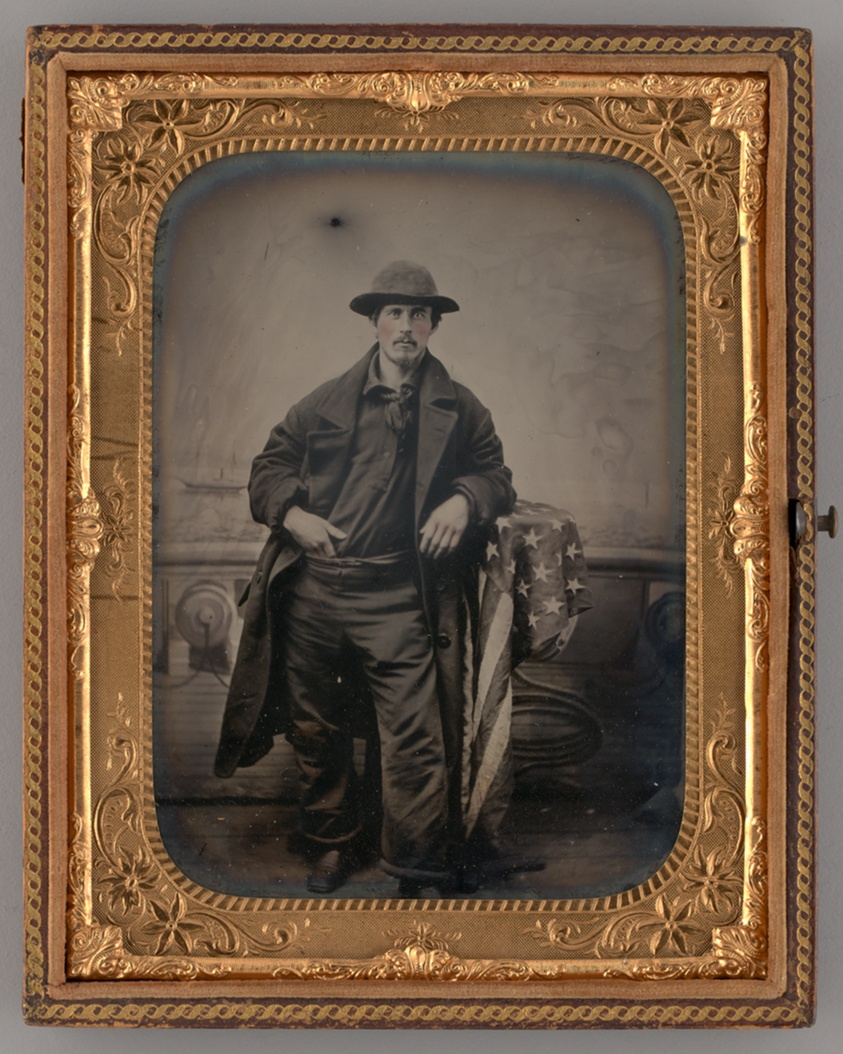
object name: Photograph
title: Untitled (Portrait of a Standing Man)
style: 19th century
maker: Unknown maker; American, 19th century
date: 1860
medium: Tintype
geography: United States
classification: portrait; tintype; portrait; photograph; photographic process; photography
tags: lundberg collection, American flag, Male, portrait, portraits, portraits: male subject